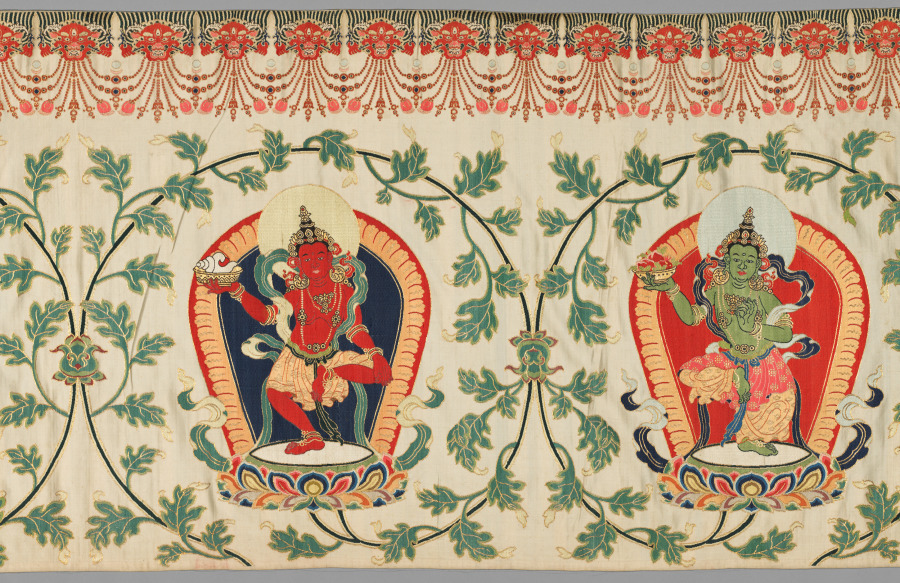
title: Brocaded Strip, known as "Imperial Tribute Brocade"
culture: China, Qing dynasty (1644-1911)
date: c. 1770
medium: brocaded satin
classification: Textile